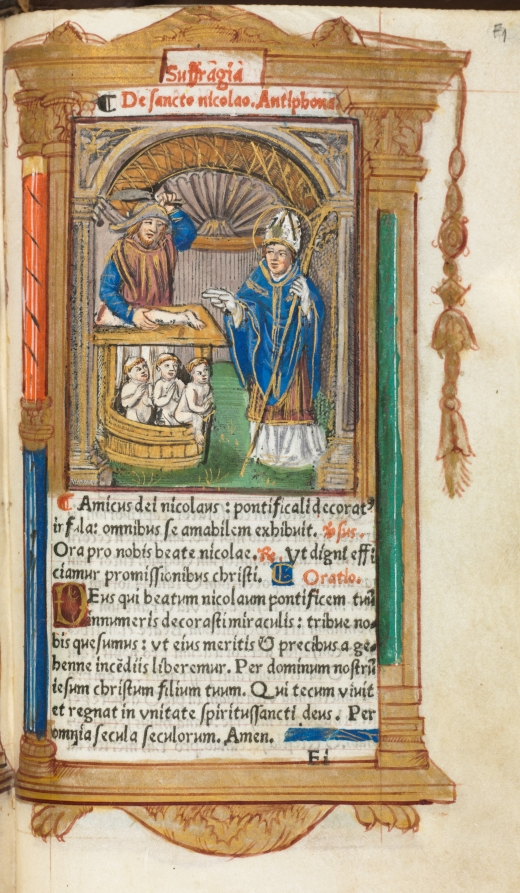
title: Printed Book of Hours (Use of Rome): fol. 105r, St. Nicholas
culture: France, Paris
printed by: Guillaume Le Rouge (French, Paris, active 1493–1517)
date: 1510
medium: 112 Printed folios on parchment, bound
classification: Bound Volume